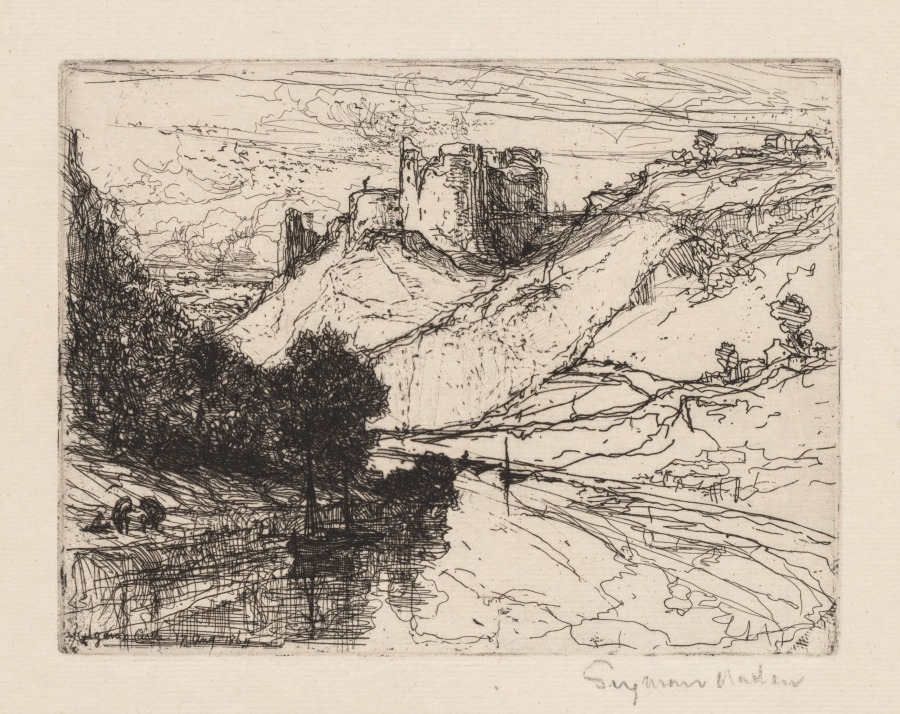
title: Kilgaren Castle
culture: Great Britain, 19th century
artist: Francis Seymour Haden (British, 1818–1910)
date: 1864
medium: etching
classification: Print